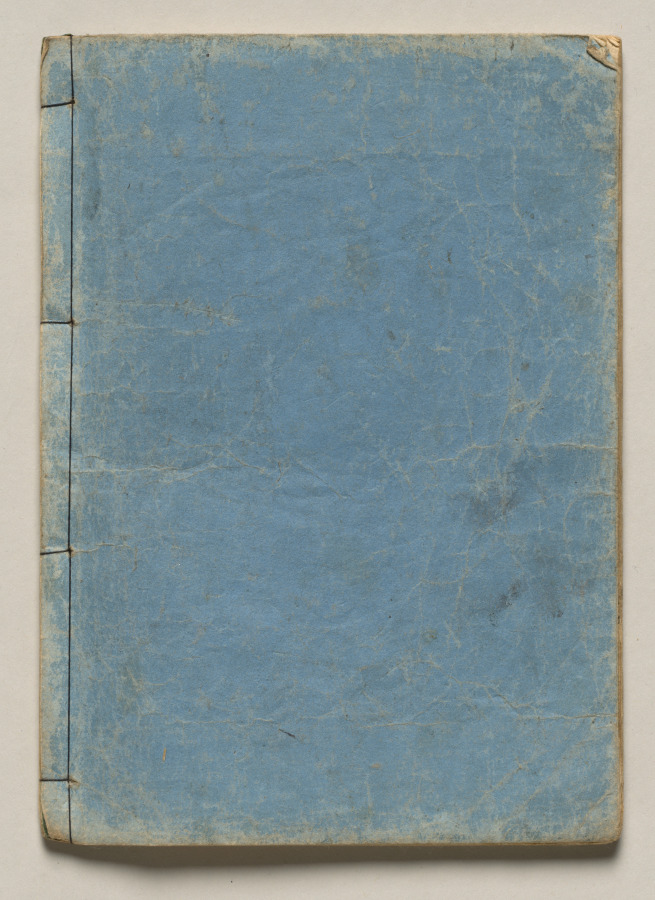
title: Volume Six of People of Japan in Light Verse (Kyōka)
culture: Japan, Edo period (1615–1868)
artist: Utagawa Hiroshige (Japanese, 1797–1858)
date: 1857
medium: Woodblock-printed book; ink and color on paper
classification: Bound Volume